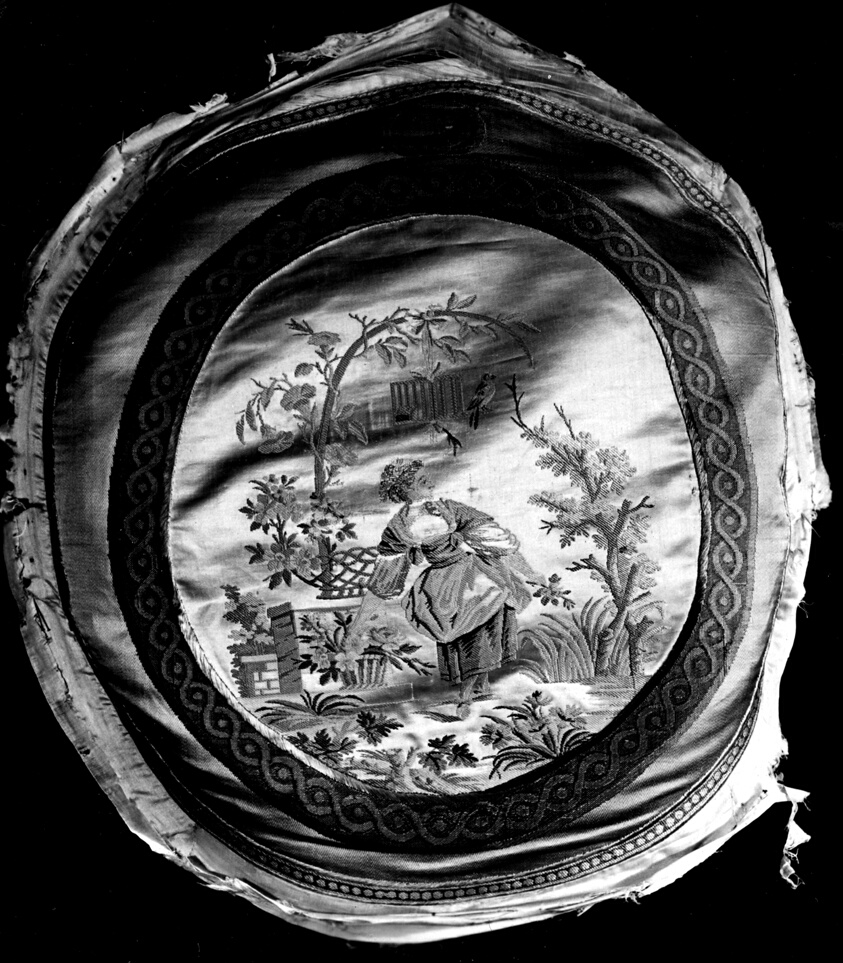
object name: Textile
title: Medallion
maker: Designed by Phillipe de LaSalle (French, 1723–1803/05); France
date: c.1780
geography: France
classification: textile; weaving